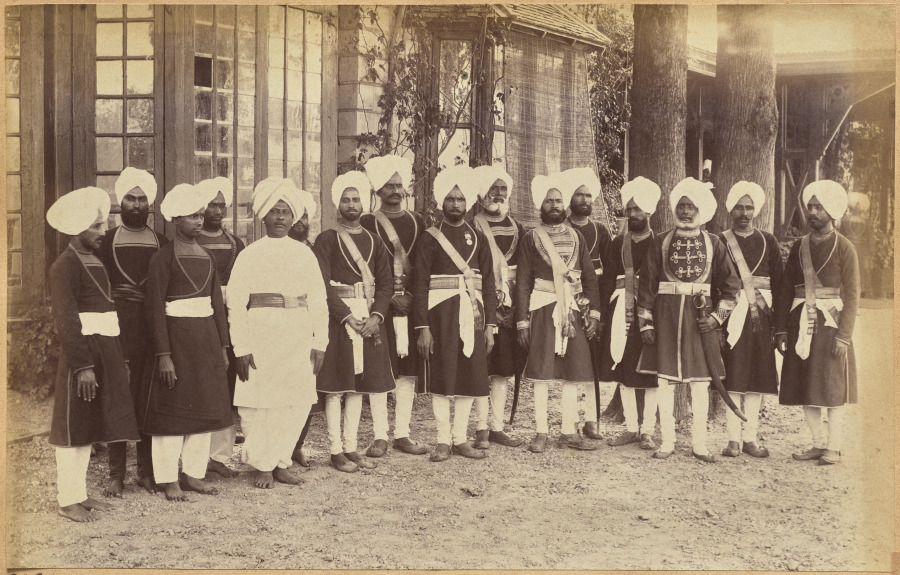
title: Servants of His Honor the Gov. of Punjab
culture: India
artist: Raja Deen Dayal (Indian, 1844–1905)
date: c. 1882–87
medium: albumen print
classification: Photograph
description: These photographs are part of an album, now disassembled, of around 105 photographs taken in India between 1885 and summer 1887 that provide glimpses into the lives of the British colonial elite and royal and upper-class Indians. The museum holds another group of 37 pictures from this album (2016.266), which was probably commissioned by a British civil servant visiting or working in India around 1888 as a personal souvenir of his experiences there.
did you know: Raja Deen Dayal is regarded now, and was considered during his lifetime, to be India’s most important 19th-century photographer.